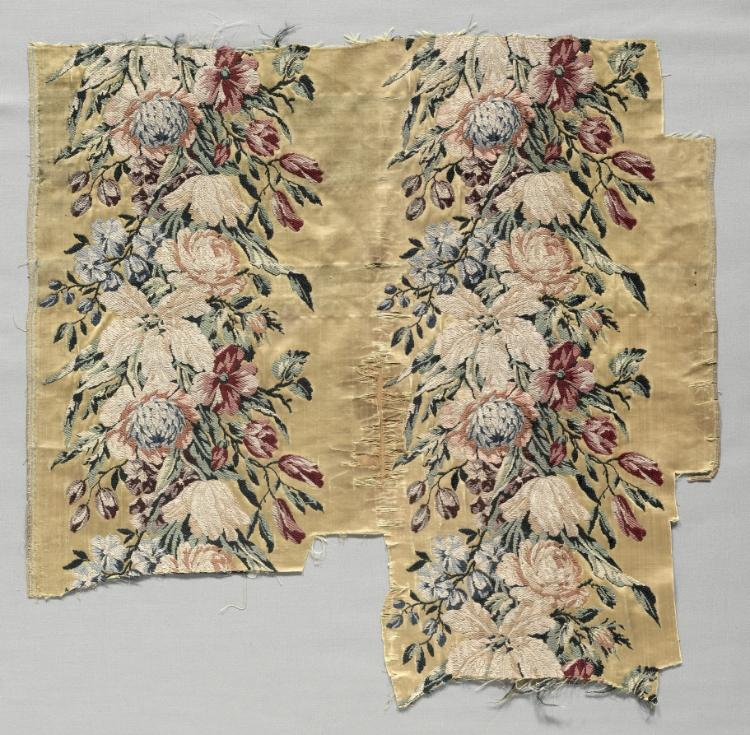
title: Brocaded Silk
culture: France, 18th century, Period of Louis XVI (1774-1793)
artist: style of Philippe de Lasalle (French, 1723–1805)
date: 1774–93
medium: Silk: brocade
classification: Textile